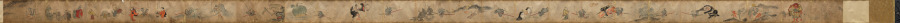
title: The Illustrated Tale of Oishi Hyōroku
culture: Japan, Edo period (1615–1868)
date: 1700s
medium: handscroll; ink and color on paper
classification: Painting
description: This incomplete handscroll illustrates part of the story of Oishi Hyoroku, a young man tasked with battling fox apparitions who were creating problems in his town. In other extant versions of the scroll, the story is set in the fall of 1624 in Kagoshima in southern Japan. Throughout the story, Hyoroku is tricked and terrified by the foxes that shift their shapes into a variety of monstrous phantoms. After repeated humiliations, he eventually captures two of the foxes. In this version, colloquial texts that function like text blurbs in comics appear throughout the scroll, but the main text is missing.